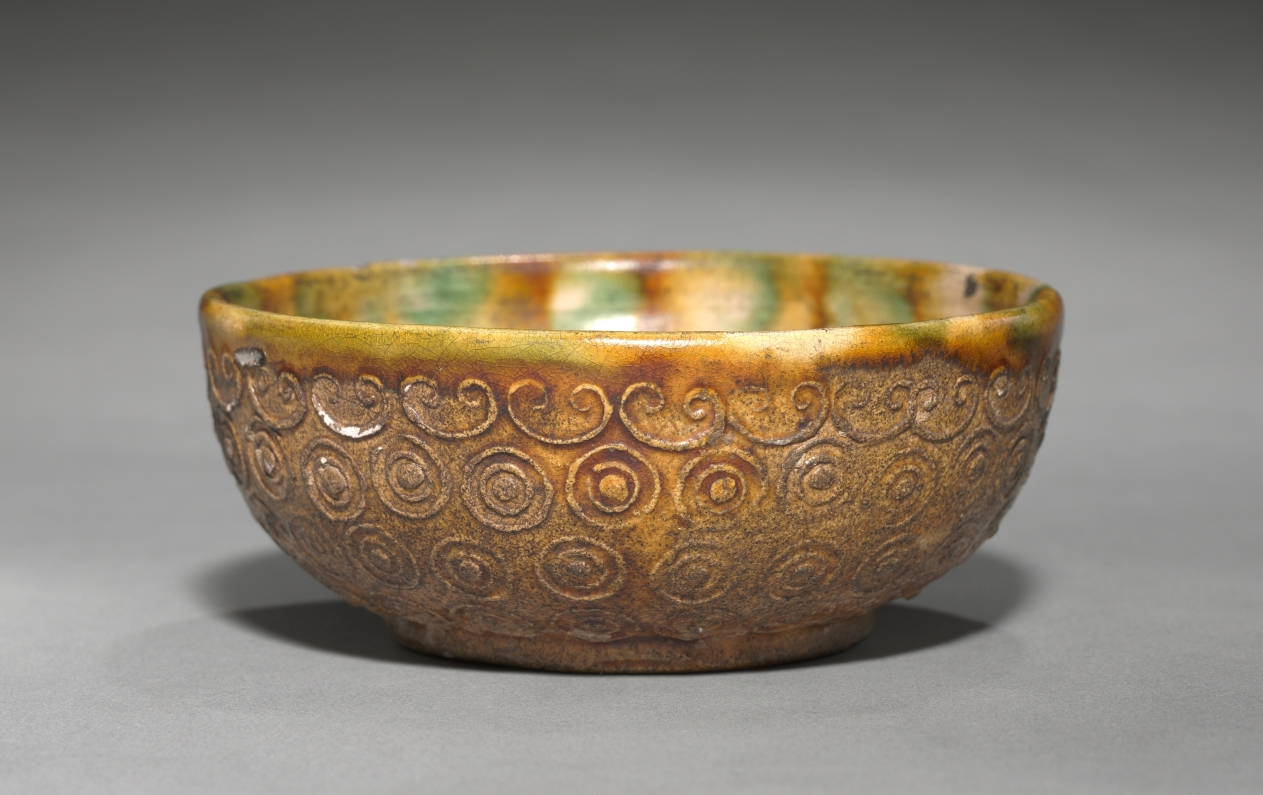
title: Bowl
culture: China, Tang dynasty (618-907)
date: 618–906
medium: glazed earthenware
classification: Ceramic